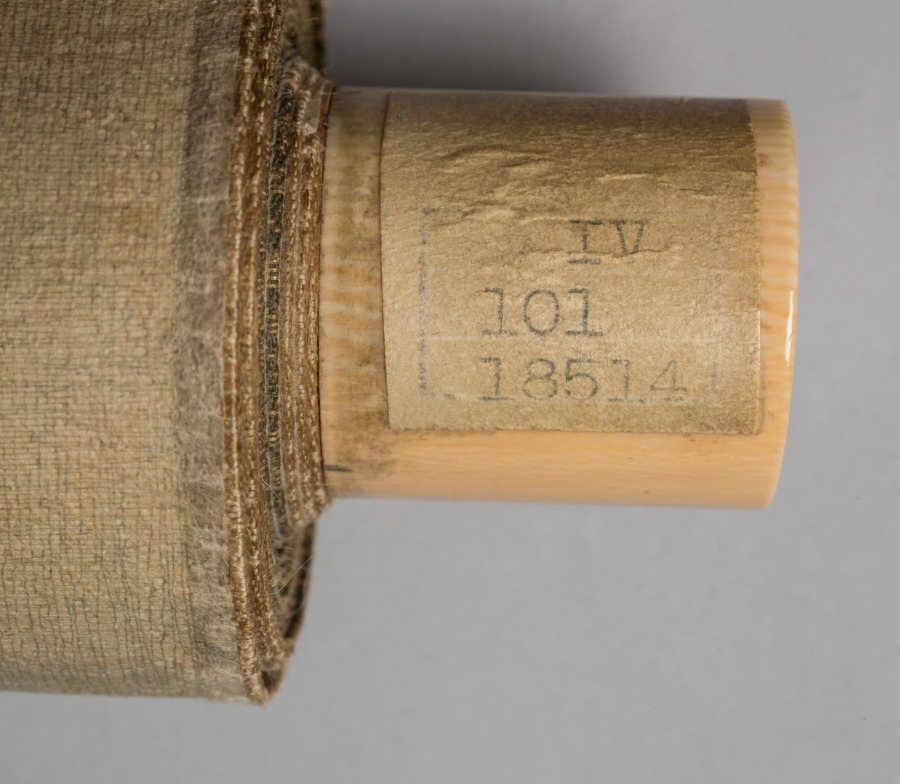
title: Landscape with a Pavilion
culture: Japan, Edo period (1615–1868)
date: c. 1700–1868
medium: hanging scroll; ink on paper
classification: Painting